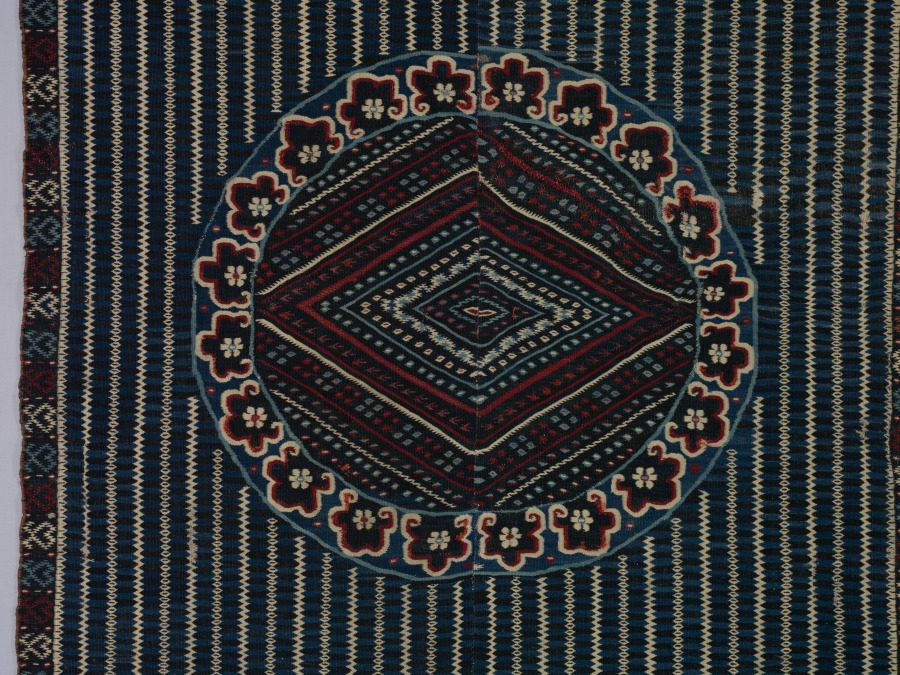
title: Saltillo Sarape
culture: Mexico, Coahuila state, Saltillo Region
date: c. 1840–60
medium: Wool, cotton; tapestry weave, macramé fringe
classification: Textile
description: The sarape (wearing blanket) is a classic Mexican men’s garment that became a symbol of national identity and pride after Mexico achieved independence from Spain in 1821. Examples woven between about 1750 and 1875 in Saltillo, a town in northern Mexico, are the sarape’s most famous representatives, prized for their design, color, and technical refinement.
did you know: Saltillo sarapes (wearing blankets) are prized for their design, color, and technical refinement.